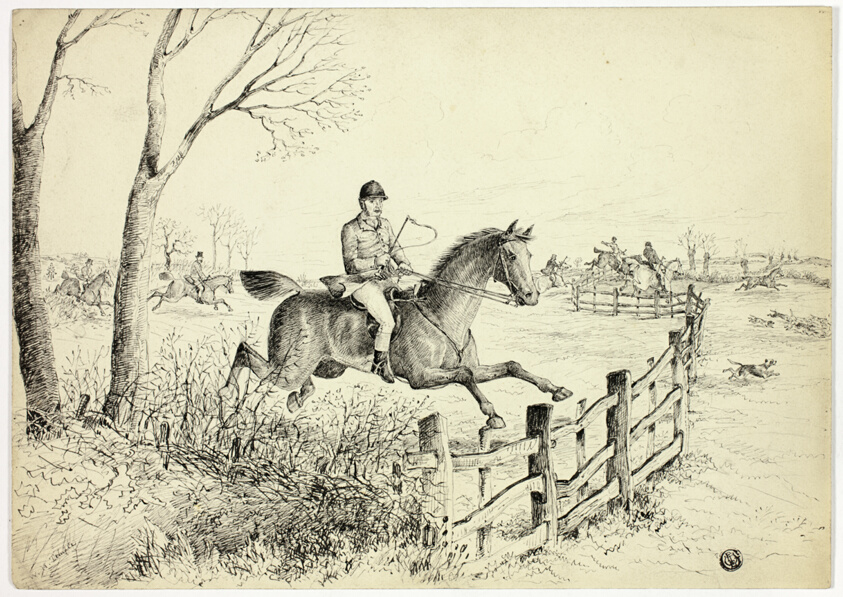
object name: Drawing and Watercolor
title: Fox Hunt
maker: W. H. Temple (British, active 1865)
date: c. 1865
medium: Pen and black ink, over traces of graphite, on cream wove paper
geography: United Kingdom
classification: pen and ink drawings; drawings (visual works); prints and drawing